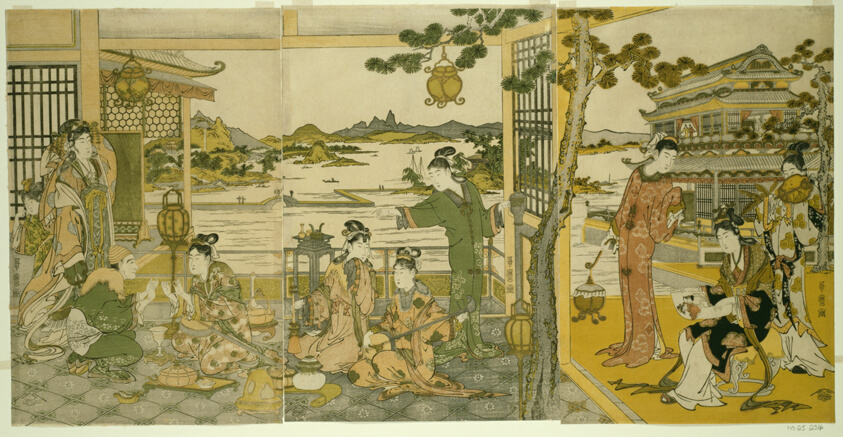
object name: Print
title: Chinese Beauties at a Banquet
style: Japanese (culture or style)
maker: Kitagawa Utamaro 喜多川 歌麿; Japanese, 1753 (?)-1806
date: 1788/90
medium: Color woodblock prints; oban triptych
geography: Japan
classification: woodblock print; print; asian art